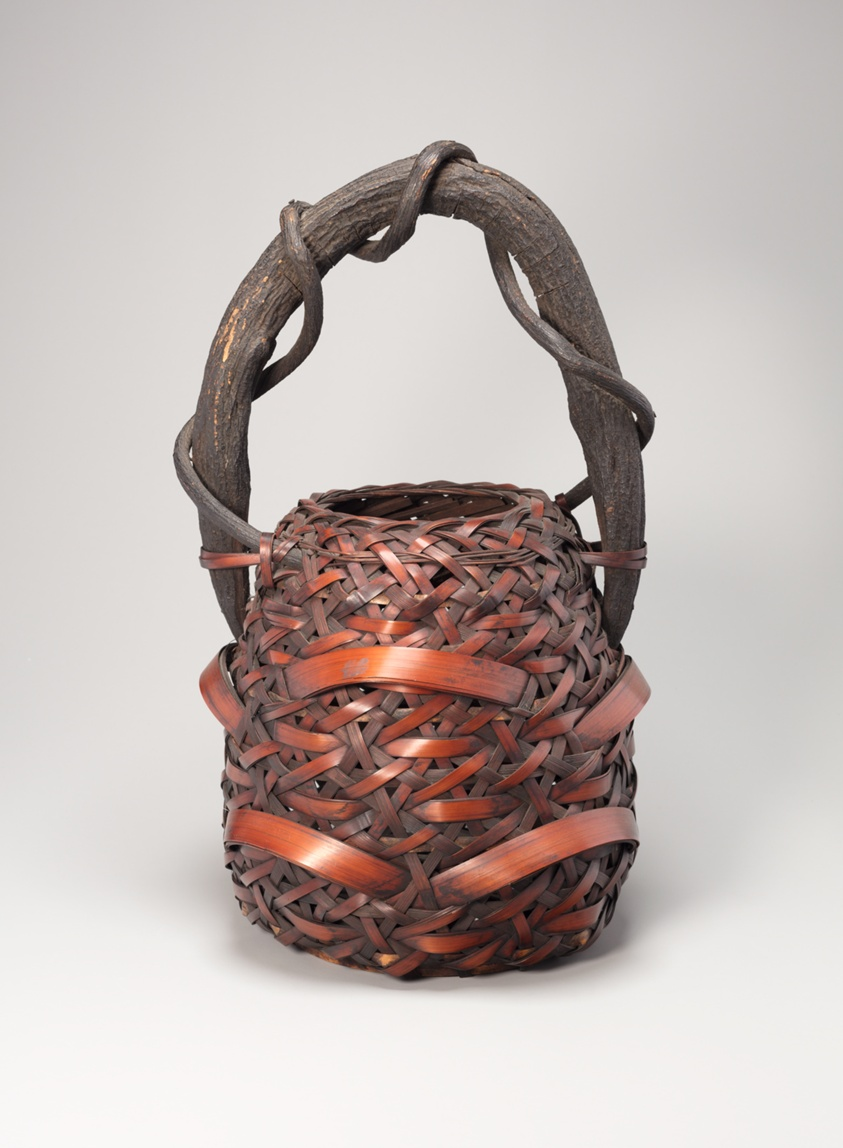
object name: Decorative Arts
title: Tall Globular Basket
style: Japanese (culture or style)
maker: Japan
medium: Bamboo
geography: Japan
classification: basketry; decorative arts